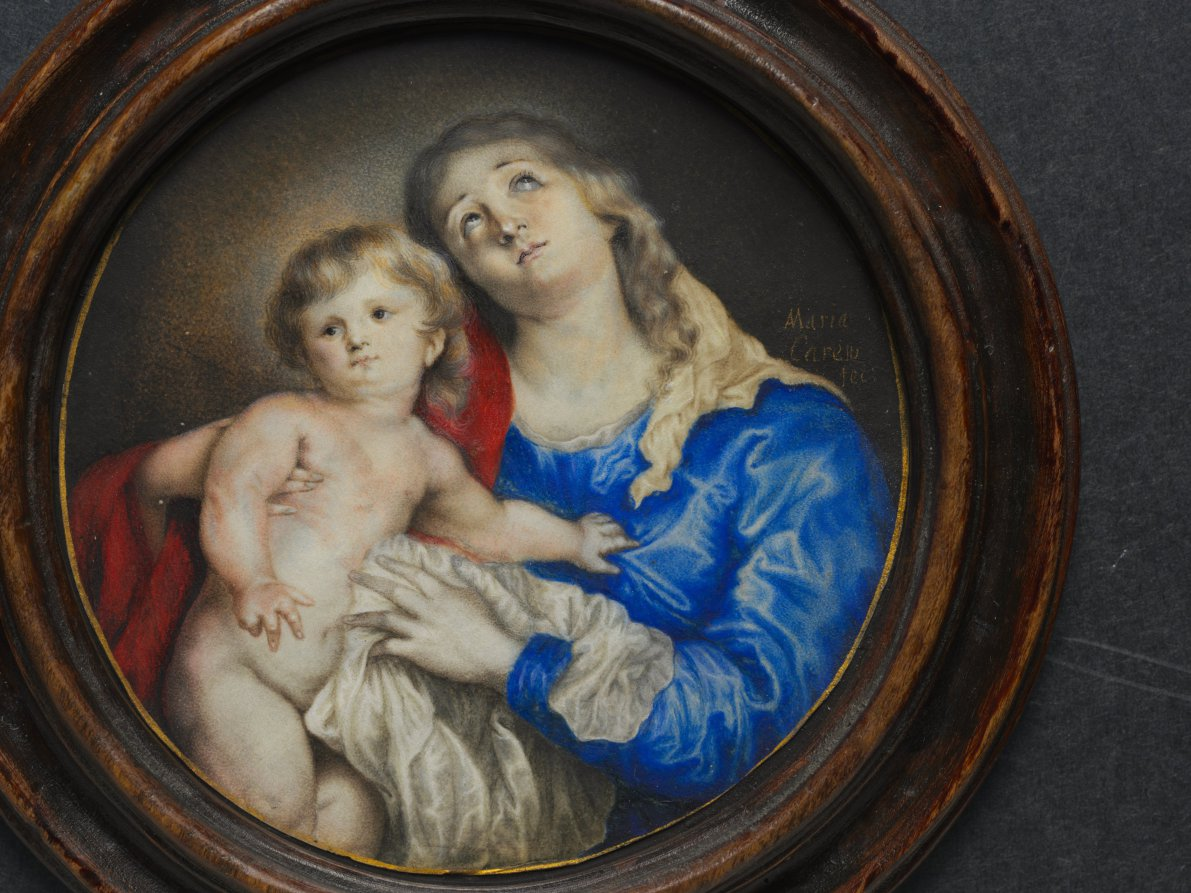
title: Virgin and Child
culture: England, 17th century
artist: Anna Maria Carew (British)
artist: after Anthony van Dyck (Flemish, 1599–1641)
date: c. 1662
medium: watercolor heightened with gum on vellum, with gold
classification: Portrait Miniature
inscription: signed at right center: "Maria Carew / fect"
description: Larger in size than most portrait miniatures, the Madonna and Child by Anna Maria Carew is a cabinet miniature, or a small work on vellum, enamel, or ivory that copies a full-scale oil painting. In this case the original painting was by Flemish artist Anthony van Dyck, and engraved by Paulus Pontius around 1630 shortly after it was painted. As a cabinet miniature, this work is somewhat unusual because of its religious subject and its simplicity. Cabinet miniatures tended instead to reproduce paintings of dramatic subjects and climactic moments in myths or religious stories. They could be hung on the wall or stored in elaborate and specially designed furniture, and they were often displayed in the smaller, more private rooms of a house.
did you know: King Charles II awarded Carew an annual pension to copy in miniature from the royal collection.